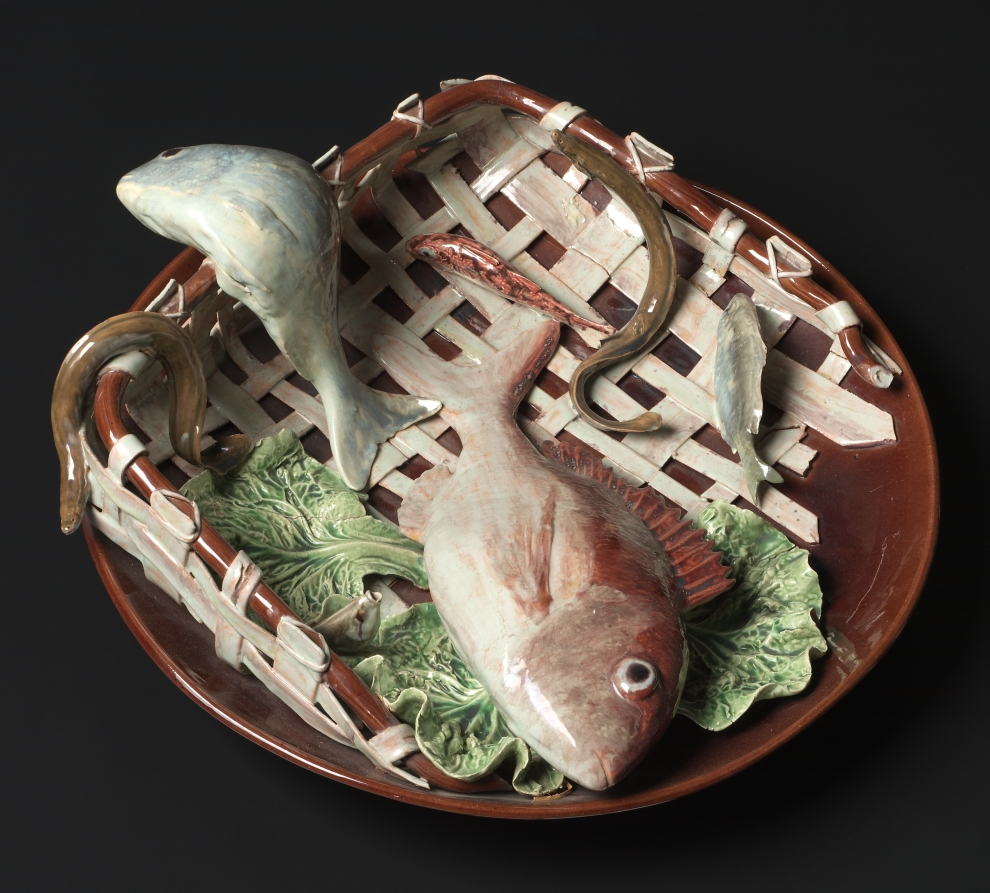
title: Plate with Fish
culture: Portugal, Caldos de Rainha, 19th century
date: 1896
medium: earthenware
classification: Ceramic